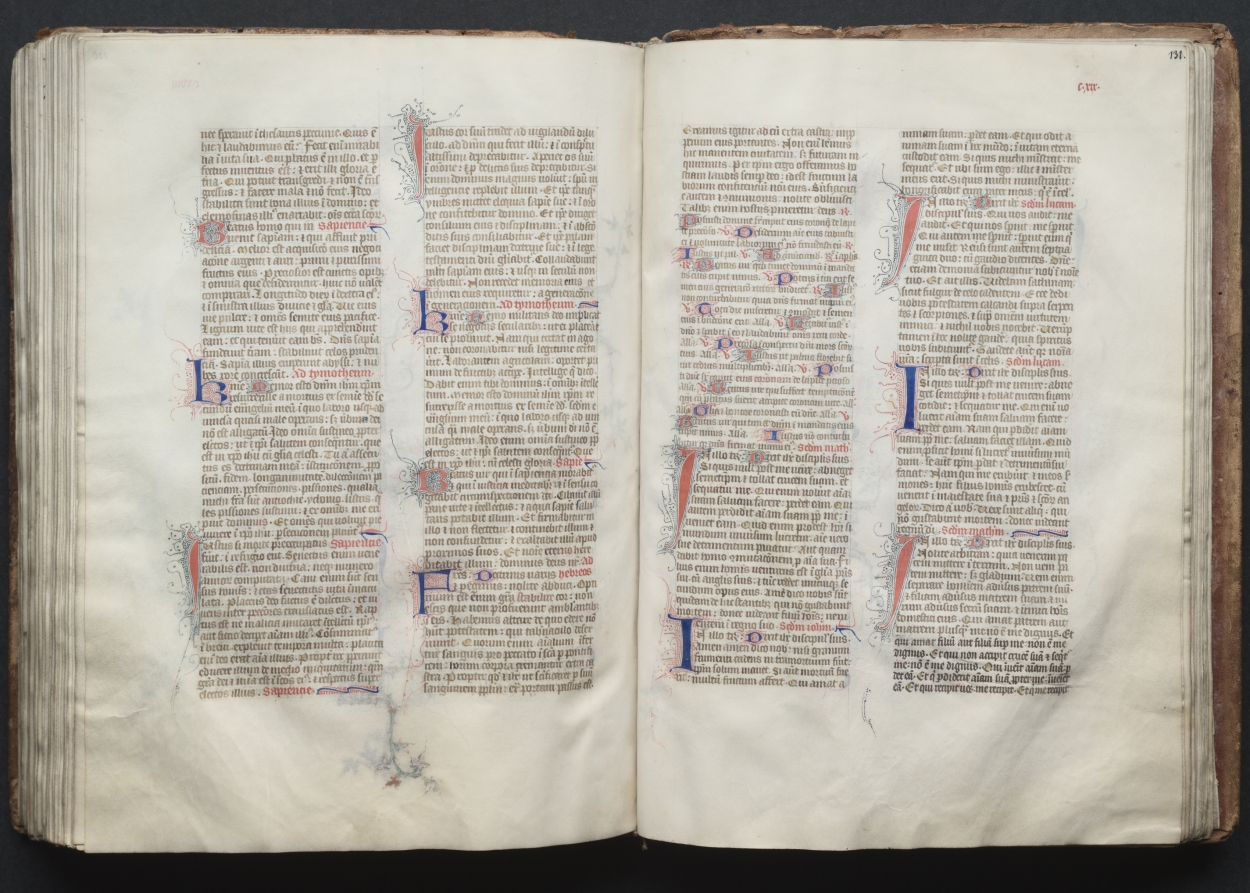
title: The Gotha Missal: Fol. 131r, Text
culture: France, Paris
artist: Master of the Boqueteaux (French)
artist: and Workshop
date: c. 1375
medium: ink, tempera, and gold on vellum; blind-tooled leather binding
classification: Bound Volume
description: The style and quality of this manuscript's decoration is typical of deluxe Parisian books made for aristocratic or royal patrons. Most of the book's decoration appears to be the work of the Master of the Boqueteaux, an artist active at the court of King Charles V (died 1380). His style was apparently shared by a number of book illuminators working in and around Paris. It is very possible that the Gotha Missal belonged to Charles V, but is not provable because the manuscript has no royal portraits and lacks a colophon. Given the book's magnificent decoration, however, it would seem that it was produced for a Valois prince, if not for the king himself. The manuscript receives its name from the German dukes of Gotha, its later owners.